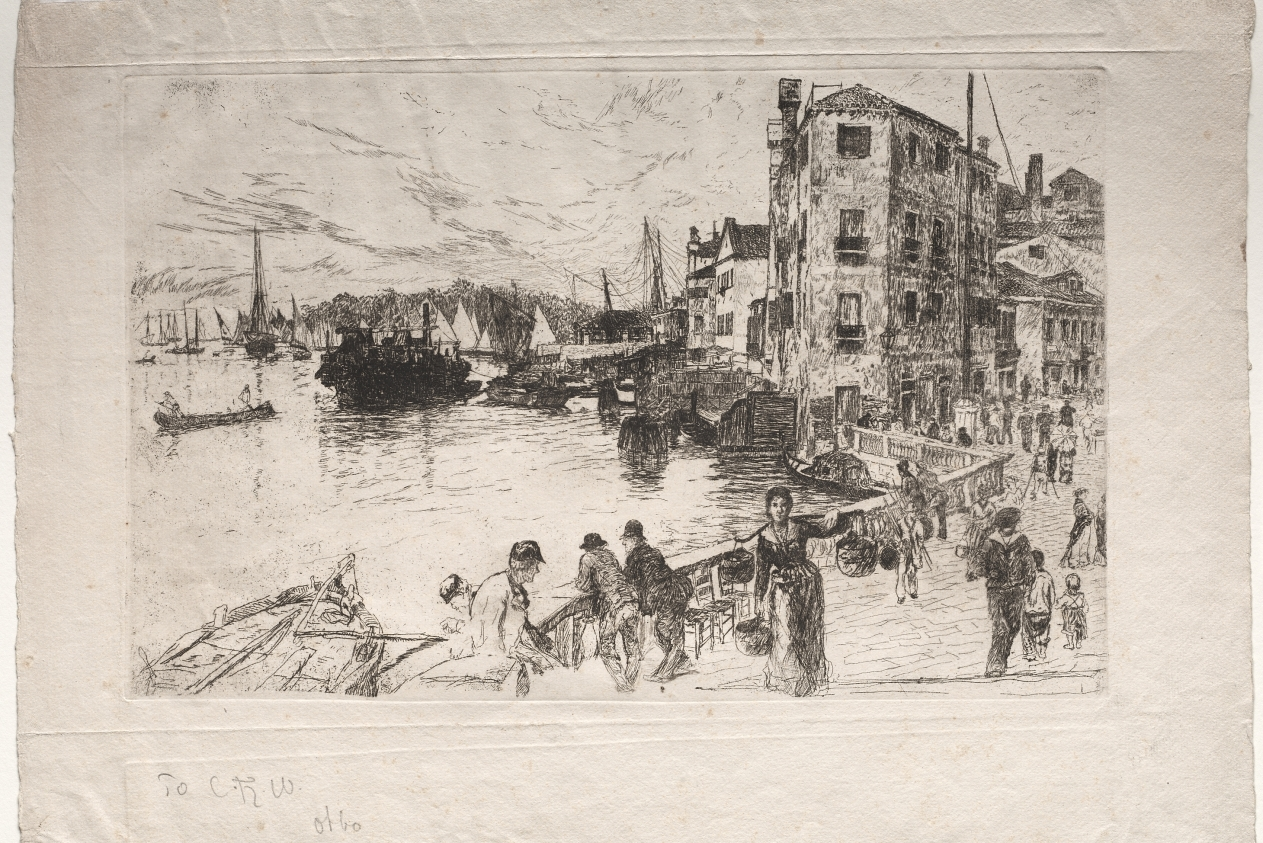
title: Castello Quarter, Riva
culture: America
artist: Otto H. Bacher (American, 1856–1909)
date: 1880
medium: etching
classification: Print